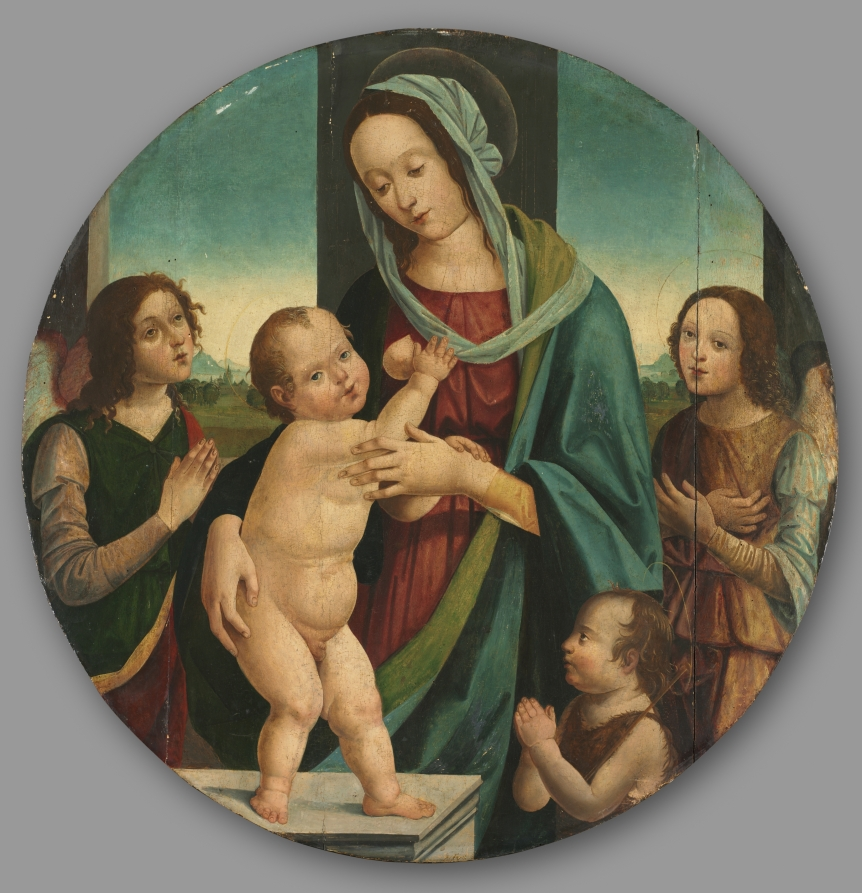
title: Virgin and Child with John the Baptist and Angels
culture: Italy, early 16th Century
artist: Pietro del Donzello (Italian, 1452–1509)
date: c. 1500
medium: oil on wood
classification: Painting